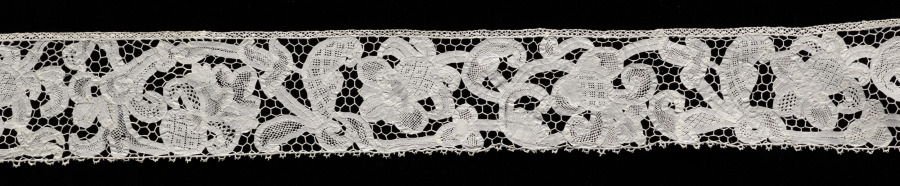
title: Lace Edging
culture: Italy, Genoa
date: 1700s–1800s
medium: Linen: needle lace and bobbin lace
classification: Lace